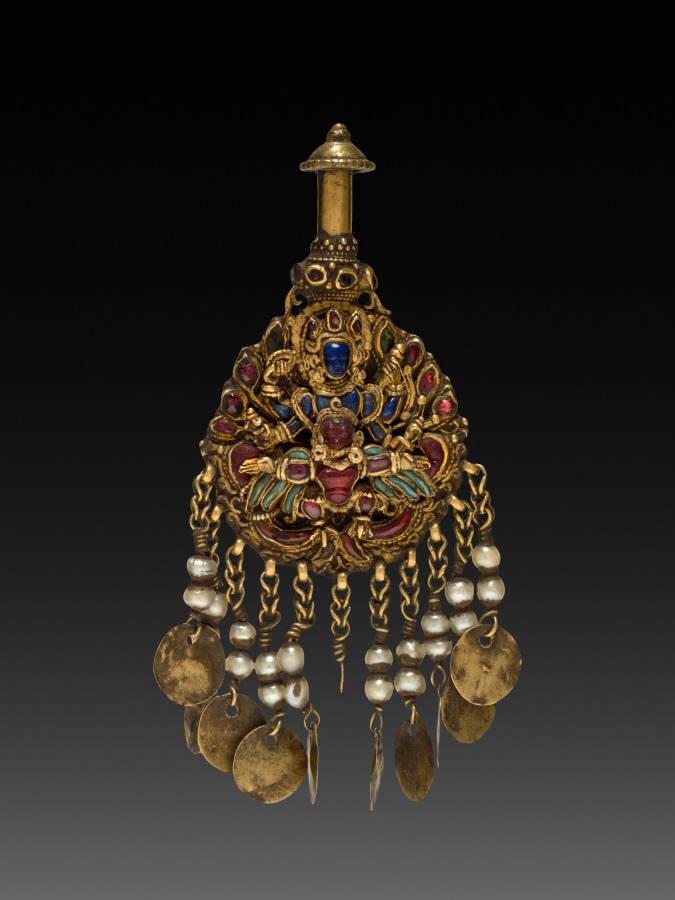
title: Earring with Vishnu Riding Garuda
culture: Nepal, Kathmandu Valley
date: 1600s or 1700s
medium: Gold set with precious and semiprecious stones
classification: Jewelry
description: This earring was made to hang on sculptures of deities worshipped in Nepalese temples. Nepalese craftsmen excelled at the detailed encrustation of jewels to depict complex figural imagery. They shaped gold wires into a framework, then inserted polished stones into the spaces, held in place with an adhesive. Four-armed Vishnu is made of sapphires; his mount the man-eagle appears to be made of carnelian and spinel with wings of turquoise.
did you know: Jeptha Homer Wade II and his wife bought this and other jewelry and textiles on a trip to India.